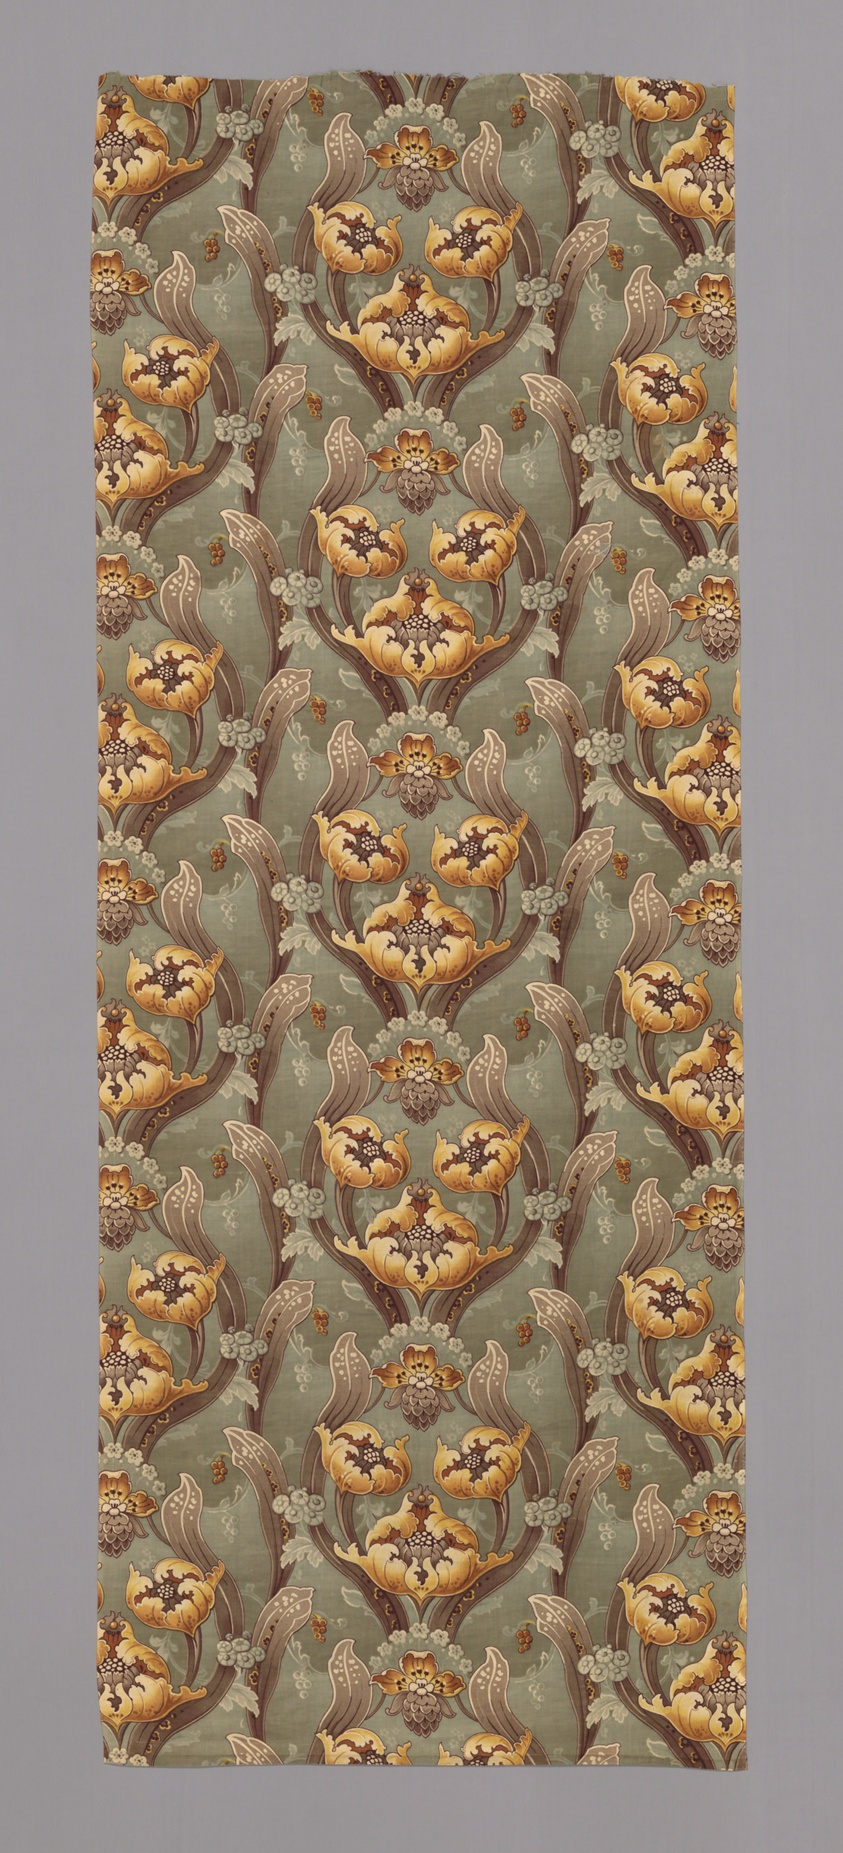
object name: Textile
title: Panel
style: Art Nouveau, european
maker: England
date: 1890s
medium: Cotton, plain weave; double-faced roller printed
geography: England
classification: textile; weaving - printed